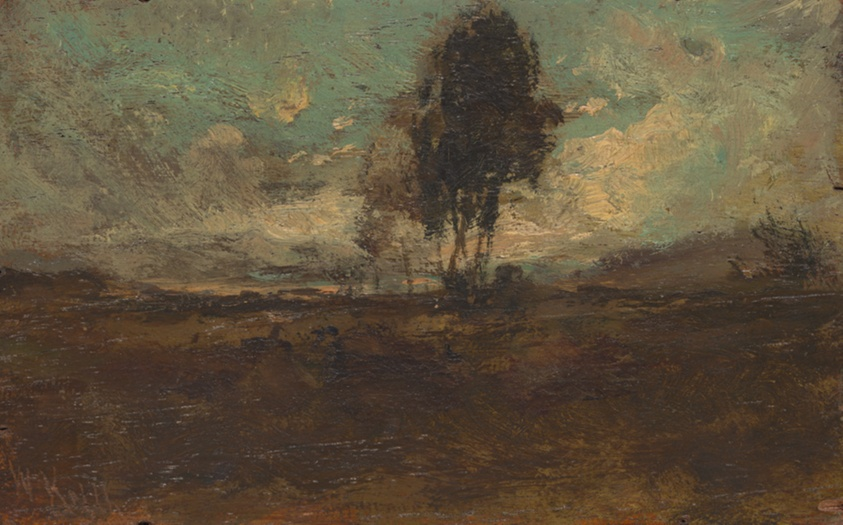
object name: Painting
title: Landscape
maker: William Keith (American, born Scotland, 1839–1911)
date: 1868-1900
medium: Oil on panel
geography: United States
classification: painting; modern and contemporary art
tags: landscape